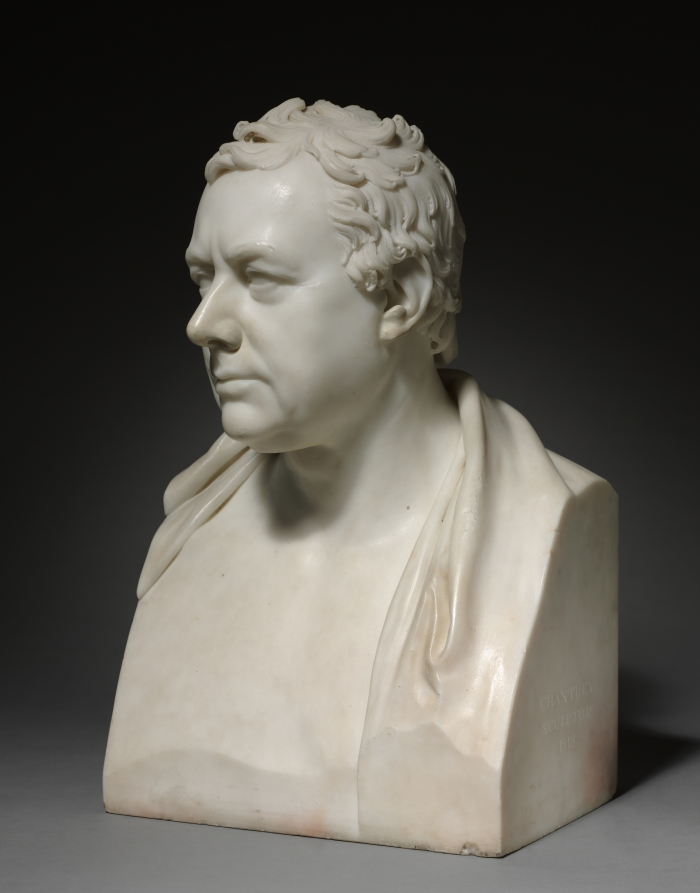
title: Sir H. C. Englefield, Bart.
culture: England, 19th century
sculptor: Francis Legatt Chantrey (British, 1781–1841)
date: 1818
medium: marble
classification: Sculpture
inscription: inscribed left side: Chantrey/Sculptor/1818; rear: Sir H. C. Englefield, Bart.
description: To modern eyes, a bare-chested portrait of a man in his mid-60s might seem undignified. However, it was fashionable for gentlemen of Englefield’s generation to be portrayed in this manner, deliberately referencing the antique sculptures of Roman statesmen they admired. As a Catholic, Englefield was barred from taking part in politics in England; however, he was a member of several clubs devoted to the amateur study of art, science, and history. Among these were the Society of Dilettanti, which championed the works of antiquity and promoted the creation of modern art in the same spirit—like this marble bust by celebrated sculptor Francis Legatt Chantrey.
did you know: Initially, Chantrey tried to establish himself as a portrait painter. After 1805, he painted only on occasion and from 1811–20, he became the leading portrait sculptor in Regency Era Great Britain.